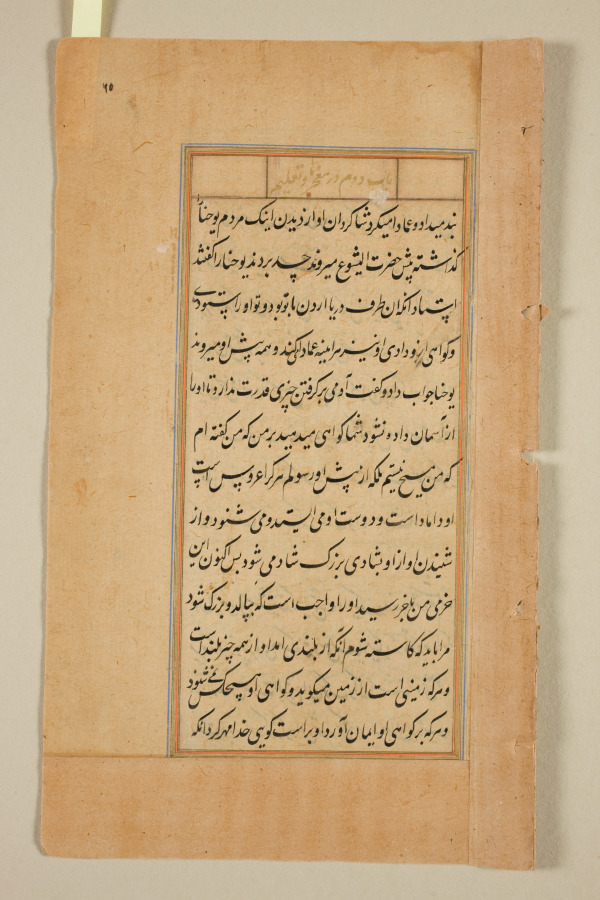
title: Text page from a Mirror of Holiness (Mir’at al-quds) of Father Jerome Xavier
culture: Mughal India, Allahabad, made for Prince Salim (1569–1627)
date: 1602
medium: Ink and gold on paper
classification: Manuscript